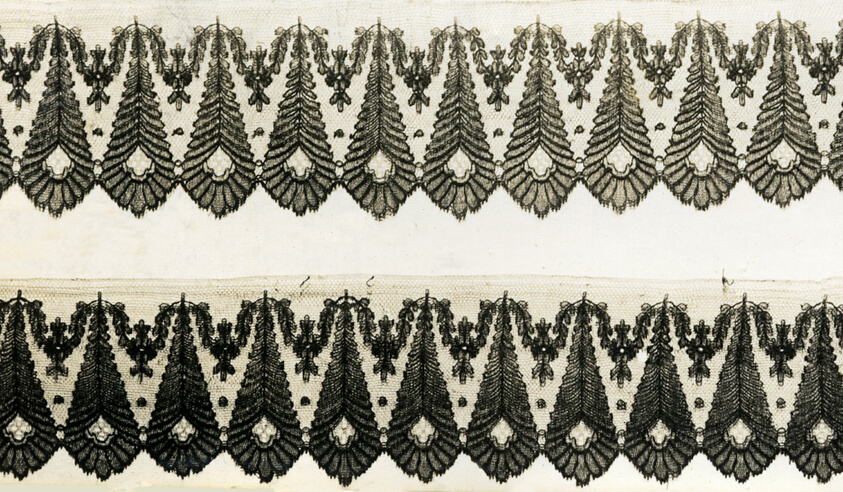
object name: Textile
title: Border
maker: England or France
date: 1870s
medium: Silk, Leavers machine lace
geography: England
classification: textile; lace - machine